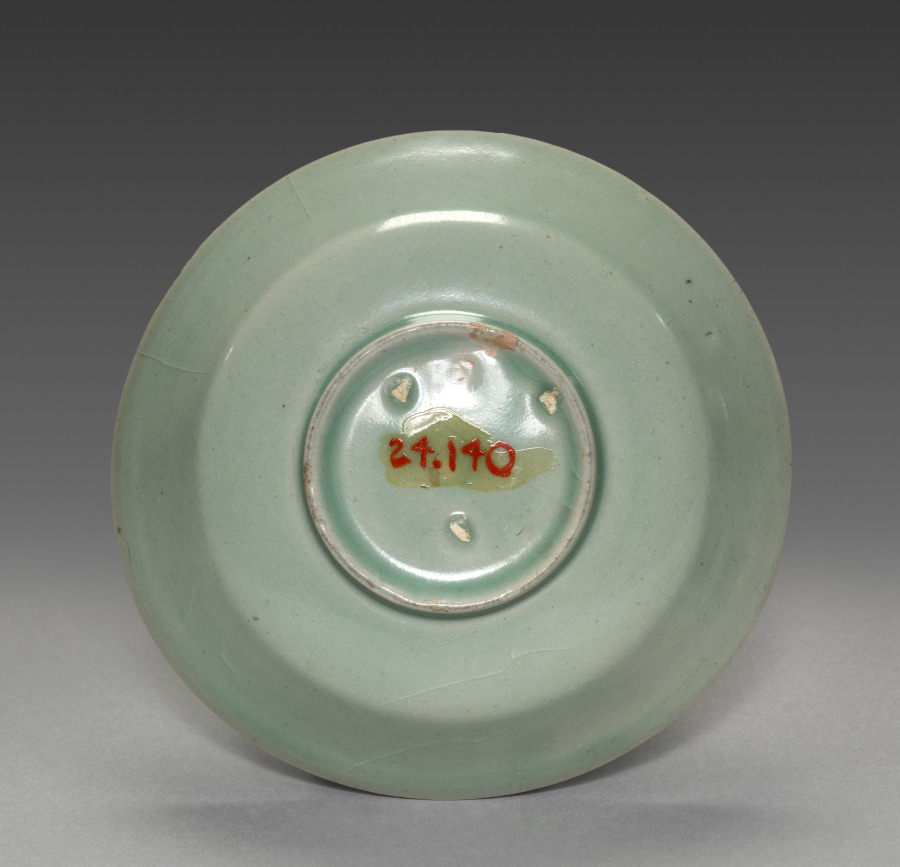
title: Dish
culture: Korea, Goryeo dynasty (918–1392)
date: 1100s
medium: glazed porcelain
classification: Ceramic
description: Celadon wares used for everyday such as this dish were among the most common burial objects in tombs during the Goryeo period (918–1392). Furnishing tombs with an elaborate assemblage of objects was believed to honor and comfort the newly dead. Generally, Goryeo tombs were left untouched until the late 1800s. During the colonial period (1910–45), however, Japanese archaeologists competitively excavated the tombs located in Kaeseong, the former capital of the Goryeo period, and soon became available for Japanese and Western collectors.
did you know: The pale bluish glaze indicates that this dish was created in the 1100s, when the production of celadon reached its technical peak.